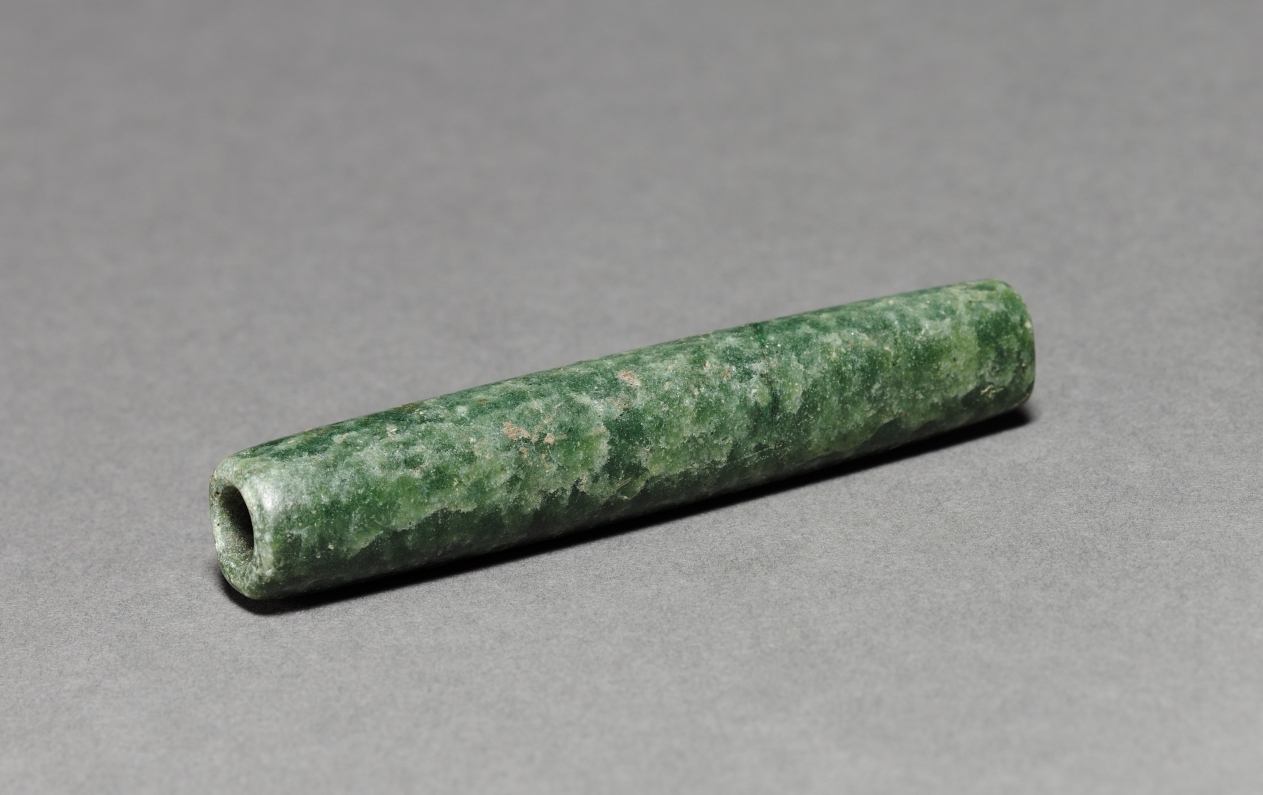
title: Tubular Bead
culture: Mesoamerica, Pre-Columbian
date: before 1519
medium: polished green jade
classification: Sculpture